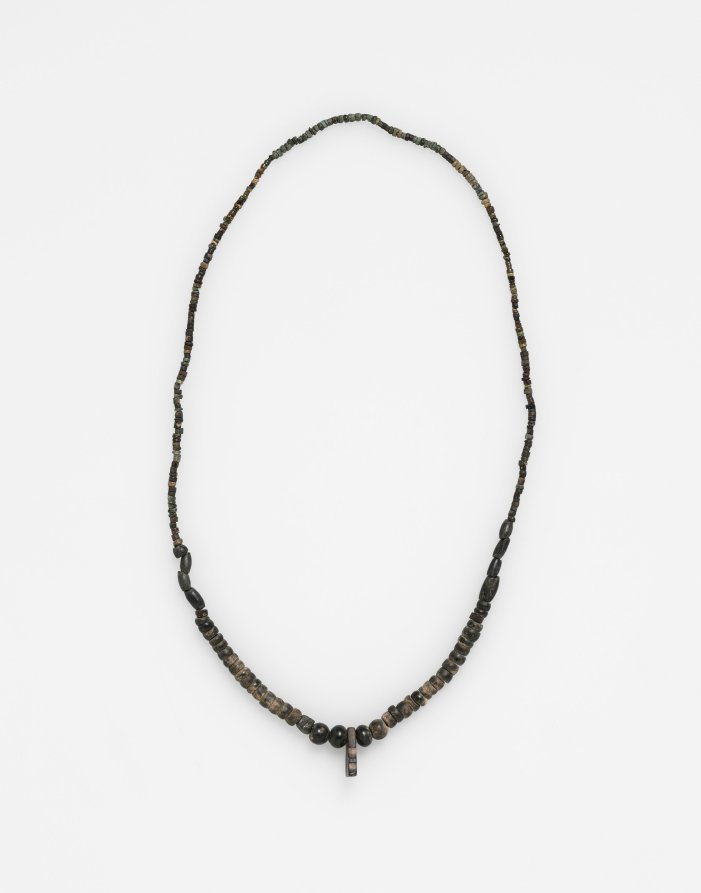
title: Necklace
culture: Peru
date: before 1532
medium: black stone beads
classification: Jewelry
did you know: These ancient beads were restrung in modern times.